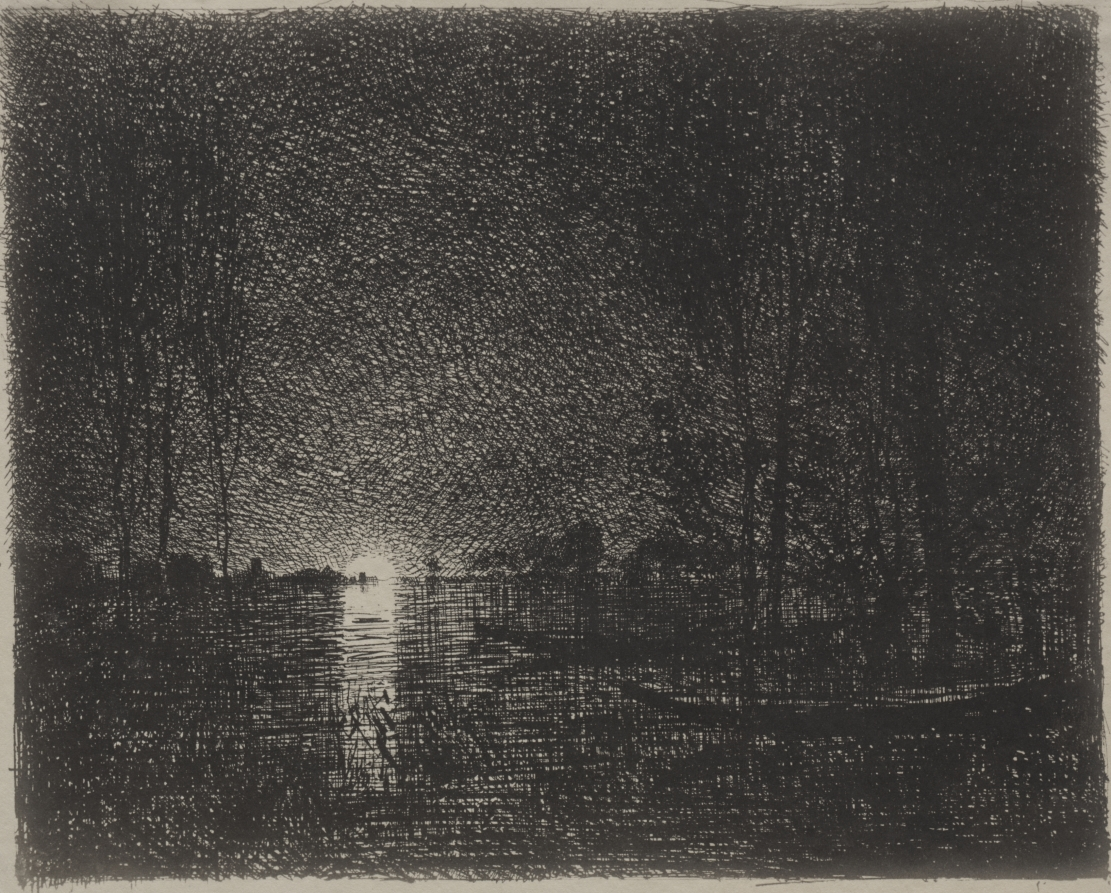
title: Nightpiece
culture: France, 19th century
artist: Charles François Daubigny (French, 1817–1878)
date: original impression 1862, printed in 1921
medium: cliché-verre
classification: Print